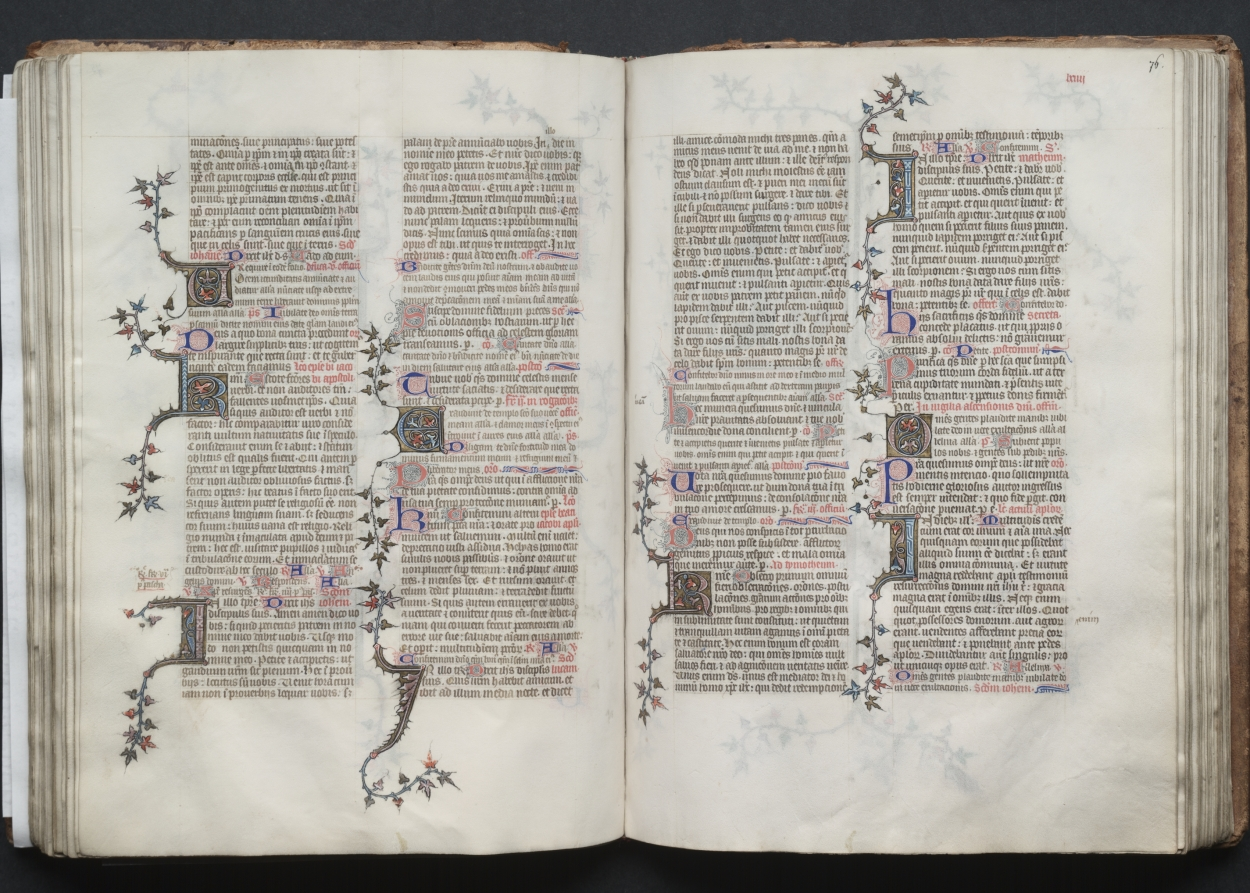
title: The Gotha Missal: Fol. 75v Text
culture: France, Paris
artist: Master of the Boqueteaux (French)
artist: and Workshop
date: c. 1375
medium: ink, tempera, and gold on vellum; blind-tooled leather binding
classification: Bound Volume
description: The style and quality of this manuscript's decoration is typical of deluxe Parisian books made for aristocratic or royal patrons. Most of the book's decoration appears to be the work of the Master of the Boqueteaux, an artist active at the court of King Charles V (died 1380). His style was apparently shared by a number of book illuminators working in and around Paris. It is very possible that the Gotha Missal belonged to Charles V, but is not provable because the manuscript has no royal portraits and lacks a colophon. Given the book's magnificent decoration, however, it would seem that it was produced for a Valois prince, if not for the king himself. The manuscript receives its name from the German dukes of Gotha, its later owners.